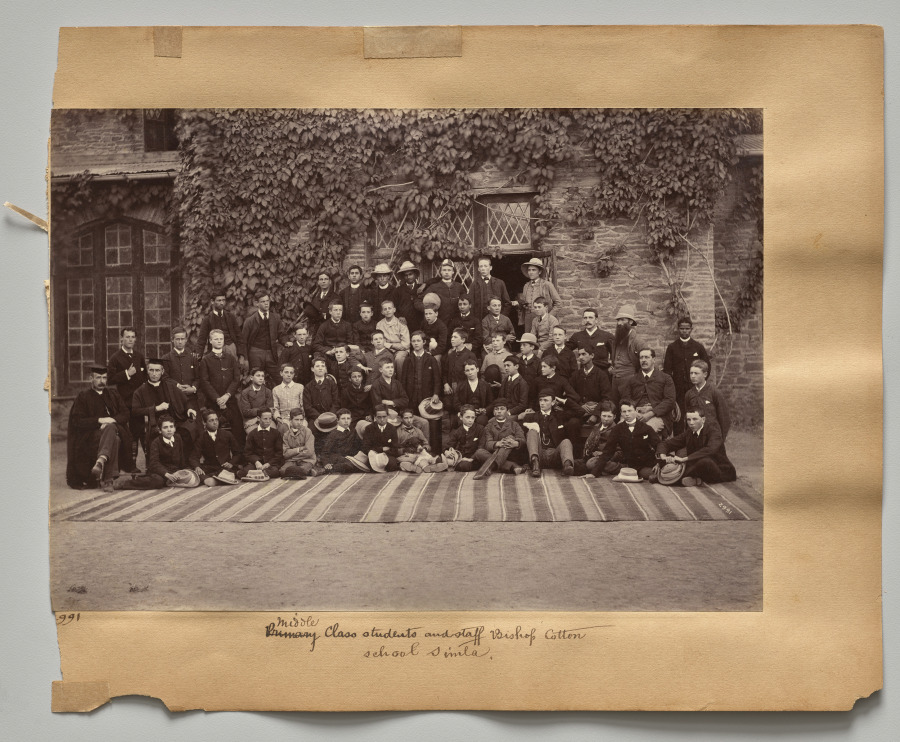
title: Middle Class Students and Staff, Bishop Cotton School, Shimla (verso)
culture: India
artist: Raja Deen Dayal (Indian, 1844–1905)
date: c. 1882–87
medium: albumen print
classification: Photograph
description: These photographs are part of an album, now disassembled, of around 105 photographs taken in India between 1885 and summer 1887 that provide glimpses into the lives of the British colonial elite and royal and upper-class Indians. The museum holds another group of 37 pictures from this album (2016.266), which was probably commissioned by a British civil servant visiting or working in India around 1888 as a personal souvenir of his experiences there.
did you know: Raja Deen Dayal is regarded now, and was considered during his lifetime, to be India’s most important 19th-century photographer.